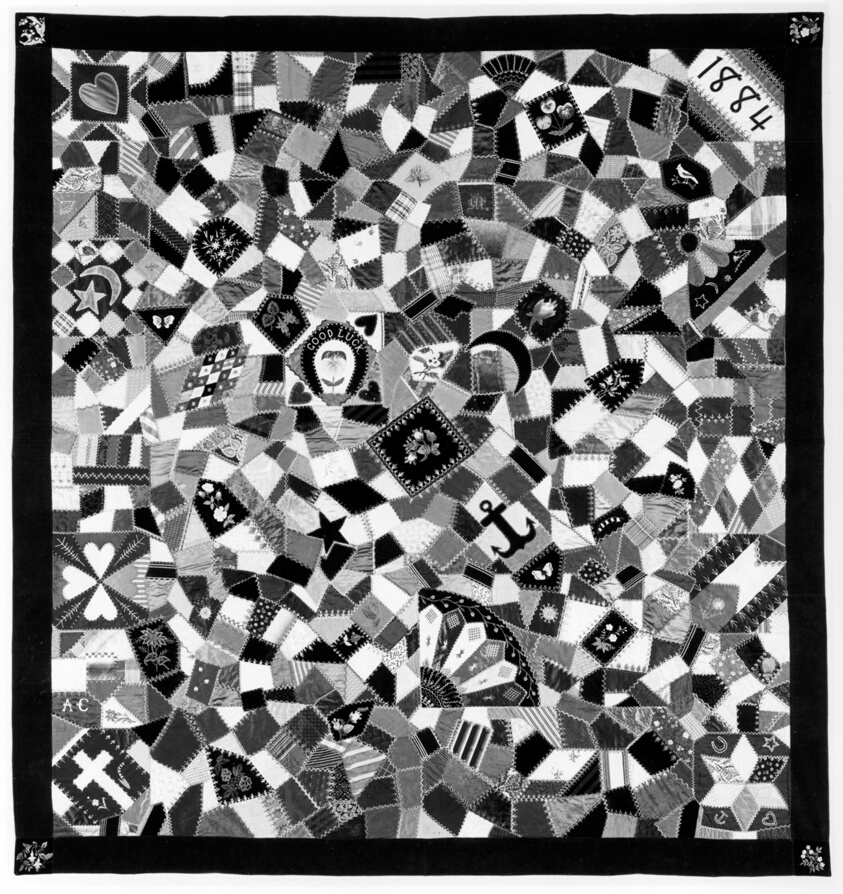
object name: Textile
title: Bedcover or Parlor Throw (Crazy Quilt)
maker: United States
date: 1884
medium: Silk and cotton, pieced plain, twill, and satin weaves, some with supplementary patterning warps, supplementary patterning and brocading wefts, self-patterning, and/or cut solid velvet; some painted; embroidered with silk in buttonhole, cross, double feather, feather, herringbone, satin, slanting Cretan, stem, and straight stitches; French knots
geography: United States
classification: textile; needlework - quilt